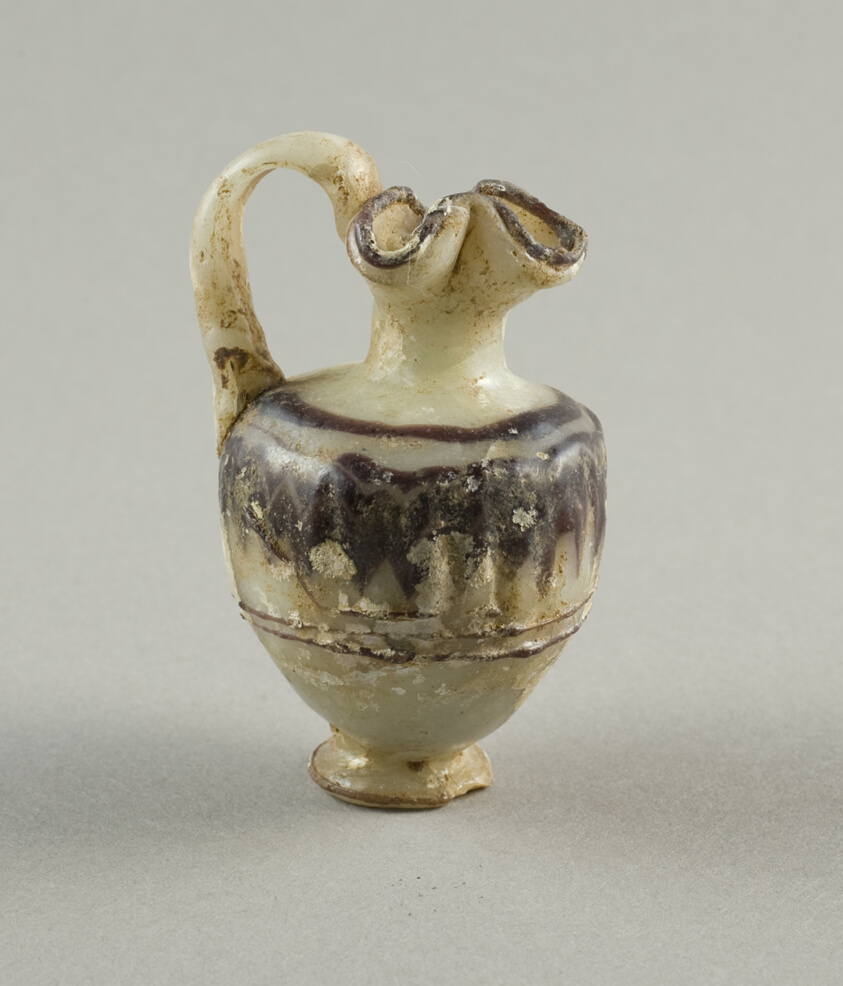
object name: Vessel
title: Pitcher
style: late period (egyptian)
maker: Eastern Mediterranean; Cyprus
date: about 5th century BCE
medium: Glass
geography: Egypt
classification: glass; vessel; ancient art